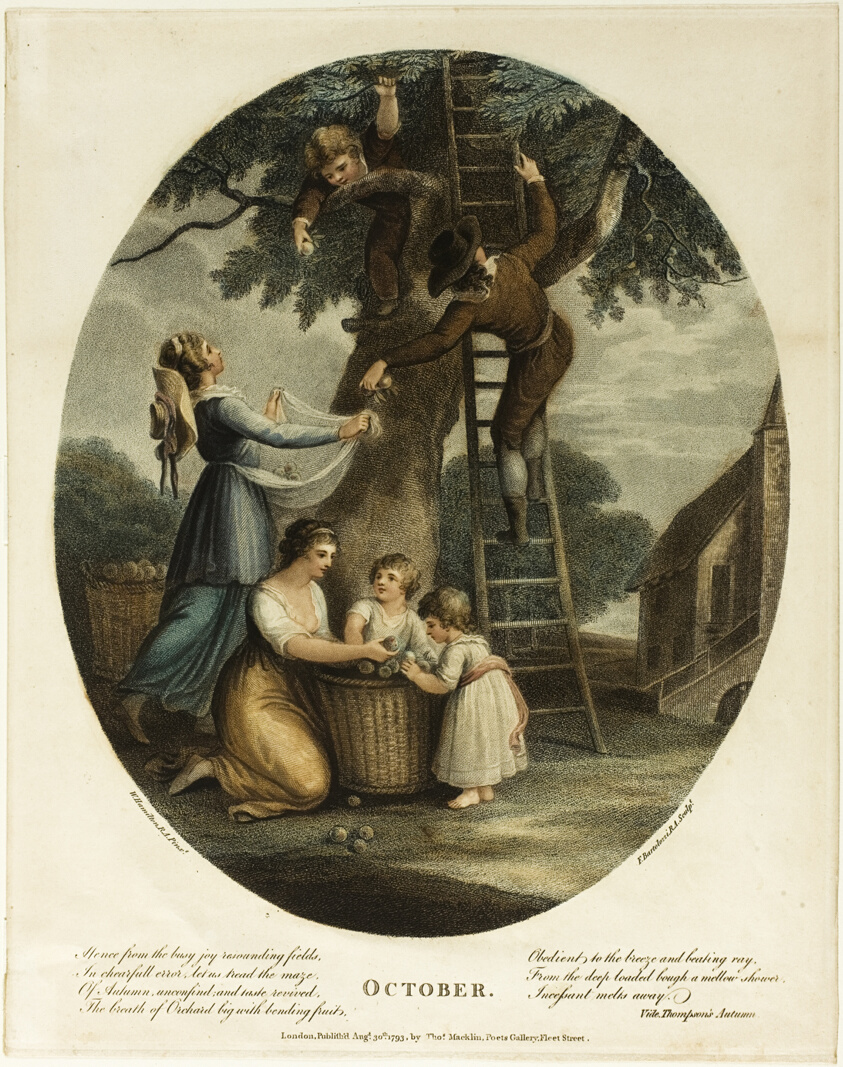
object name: Print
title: October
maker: Francesco Bartolozzi (Italian, 1727-1815); after William Hamilton (English, 1751-1801); published by John and Josiah Boydell (English, 18th century)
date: August 30, 1793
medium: Color stipple engraving on paper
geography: Italy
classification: engraving; print; prints and drawing